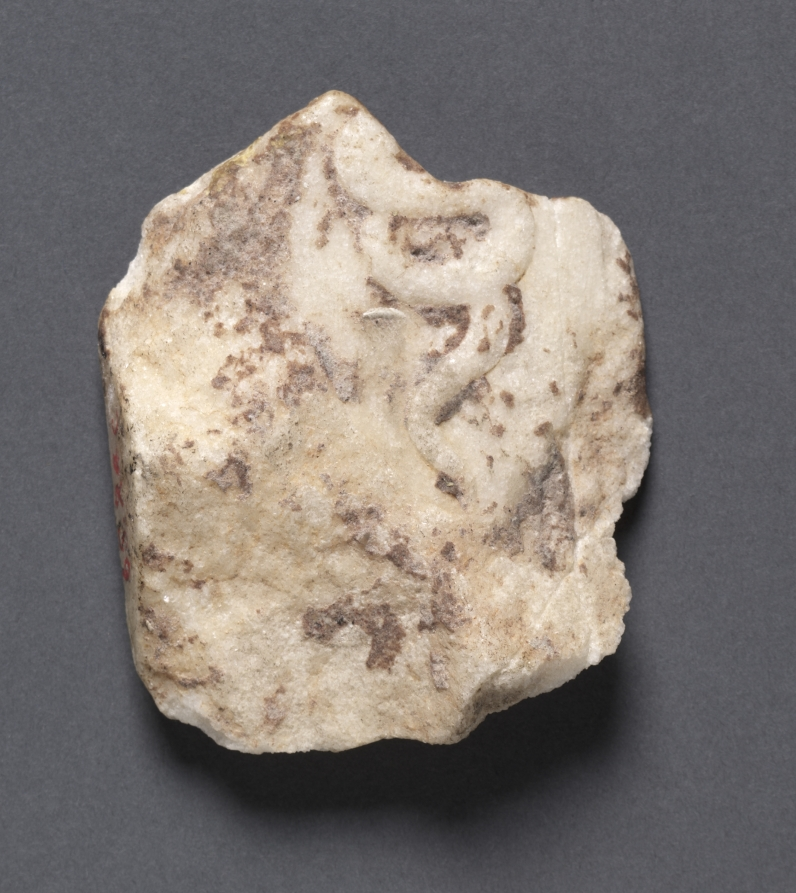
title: Fragment sent with "Dancing Lady": Serpent in Relief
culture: Greece, Alexandria(?)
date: c. 50 BCE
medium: marble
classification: Sculpture